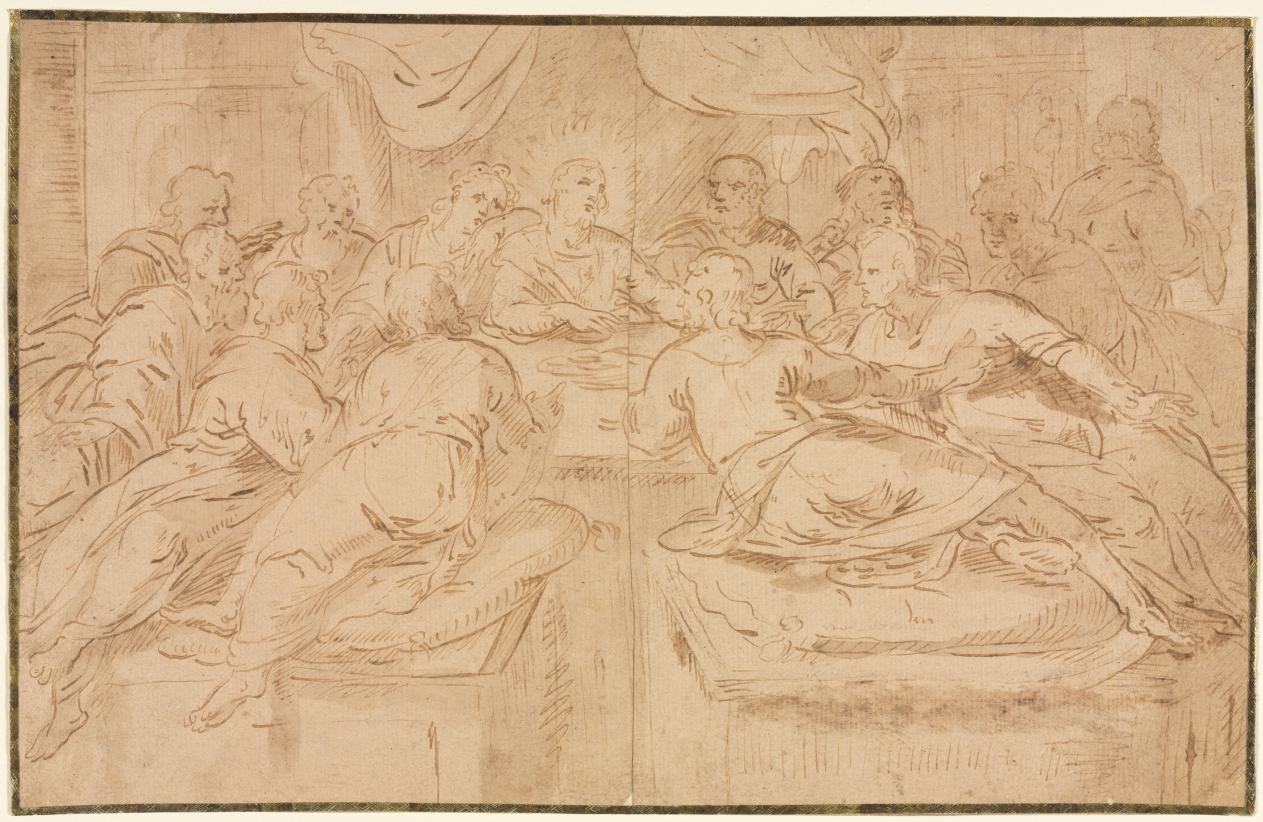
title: Last Supper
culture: France, 17th century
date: 1600s(?)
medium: pen and brown ink and brush and brown wash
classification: Drawing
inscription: VERSO, lower right, in ink: Jacop Tintorret [visible through transmitted light] ; VERSO OF SECONDARY SUPPORT: upper center, in graphite: 94 ; upper left, in graphite: Door / Jacomo Tintoretti [underlined] / Van Van Nikkelen / gekogt voor [f ?] [illegile] - ; lower left, in graphite: [f D/a ?]